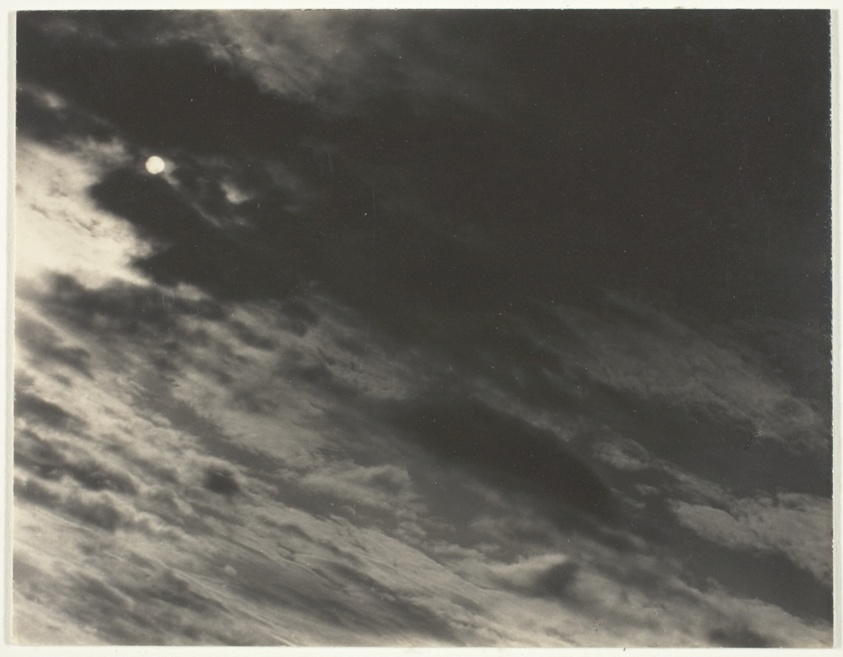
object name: Photograph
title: Equivalent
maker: Alfred Stieglitz (American, 1864–1946)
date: 1929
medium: Gelatin silver print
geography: United States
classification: gelatin silver (developing-out-paper) pr; photographic process; photography; photograph